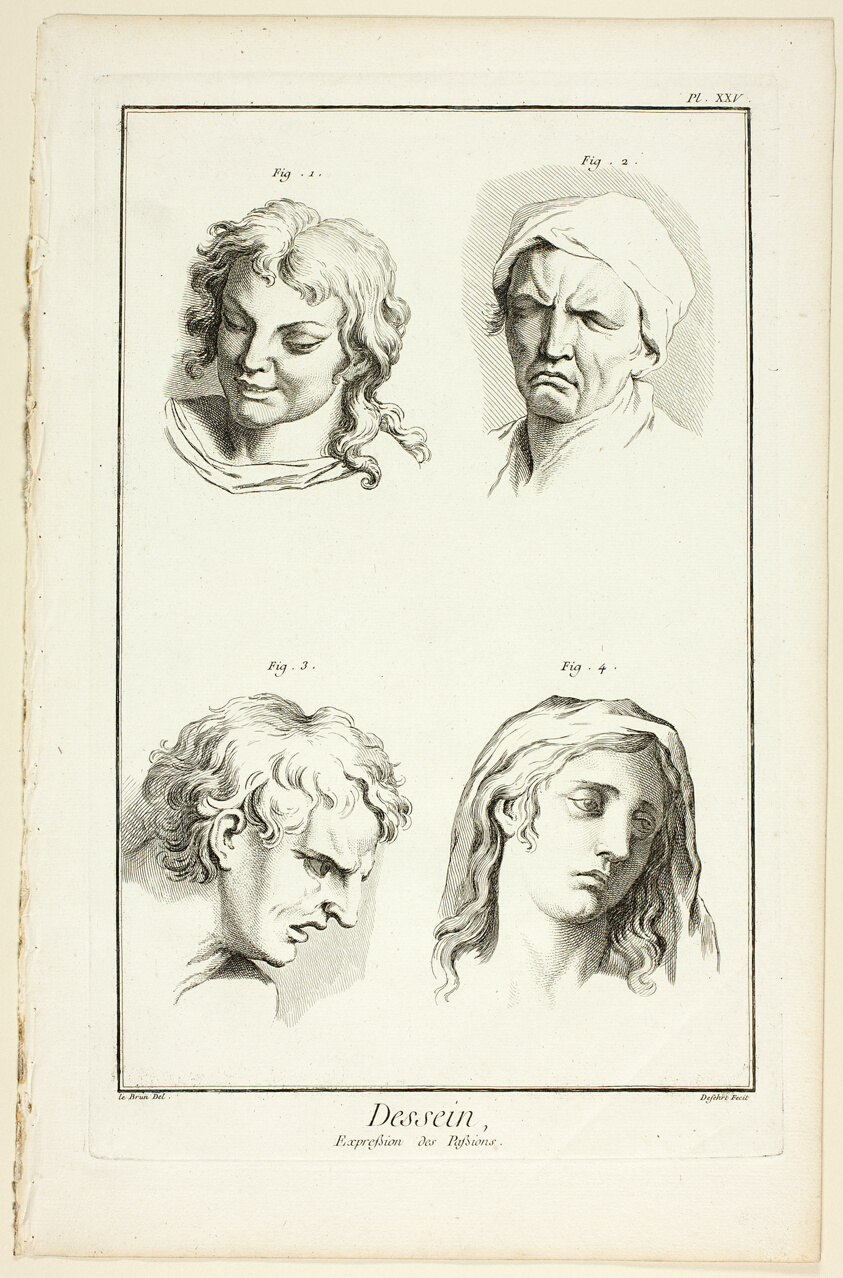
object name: Print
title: Drawing: Expressions of Emotion (Laughter, Weeping, Compassion, Sadness), from Encyclopédie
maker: A. J. Defehrt (French, active 18th century); after Charles le Brun (French, active 17th century-1765); published by André le Breton (French, 1708-1779), Michel-Antoine David (French, c. 1707-1769), Laurent Durand (French, 1712-1763), and Antoine-Claude Briasson (French, 1700-1775)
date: 1762/77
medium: Etching with engraving on cream laid paper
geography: France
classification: etching; print; prints and drawing